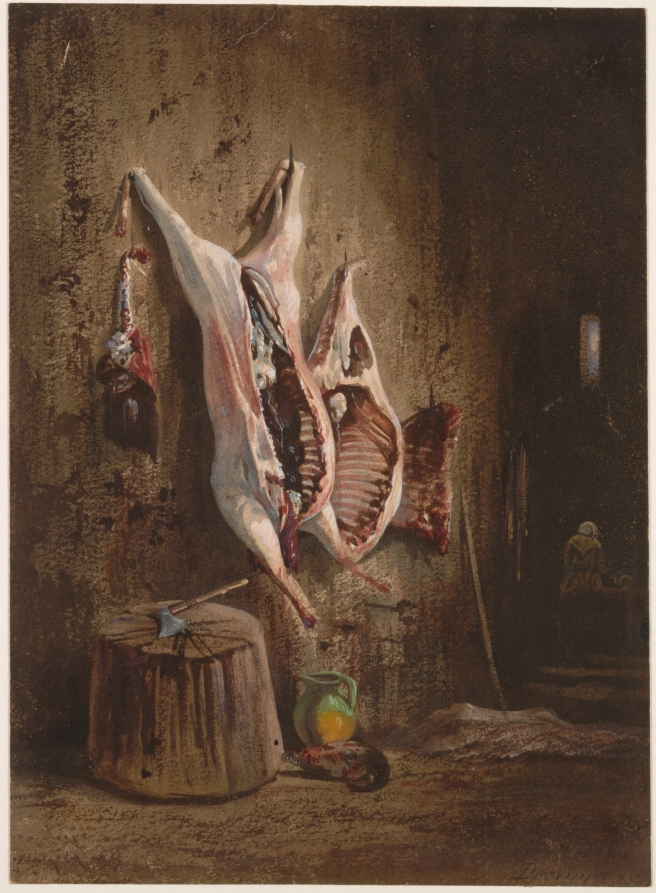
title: Carcasses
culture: France, 19th century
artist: Alexandre-Gabriel Decamps (French, 1803–1860)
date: 1840–1860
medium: watercolor and gouache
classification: Drawing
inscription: signed, lower right, in black gouache: Decamps; verso, upper right, in graphite: 73; upper center, in graphite: [illegible] [Bruget?] / a [Degert?] [all partially erased]; upper center, in graphite: (Decamps [written over previous inscription]; center, in graphite: 19 [circled]; lower right, in graphite: 19 x 12 2; lower left, in graphite: 82; lower right, in graphite: d559cfe 2 s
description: With the subject of Carcasses, Alexandre-Gabriel Decamps was following an old artistic tradition. He was inspired by Rembrandt's (1606-1669) Slaughtered Ox (see photo) which he would have seen at the Louvre Museum. Decamps greatly admired the Dutch master and owned several paintings by him. In spite of the inspiration from Rembrandt, Decamps's watercolor of about 200 years later conveys a different mood. Instead of focusing on a single butchered corpse as Rembrandt had, Decamps viewed his bodies and slabs of meat from further back, and he included domestic objects and a background figure standing at a table. Decamps's resulting image stands less as a symbol of death and more as a matter-of-fact representation of daily life.